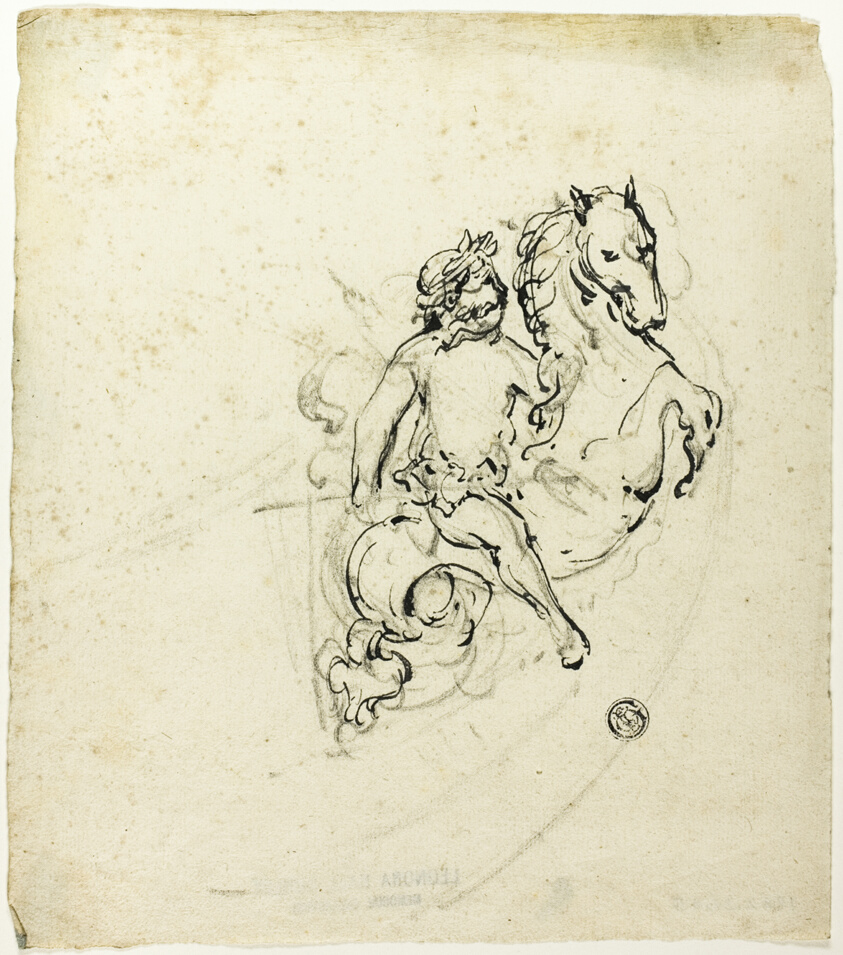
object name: Drawing and Watercolor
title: Putto Crowned with Laurel, on Prancing Horse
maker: Unknown Artist; Italy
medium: Brush and black ink, over graphite, on ivory laid paper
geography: Italy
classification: pen and ink drawings; drawings (visual works); prints and drawing